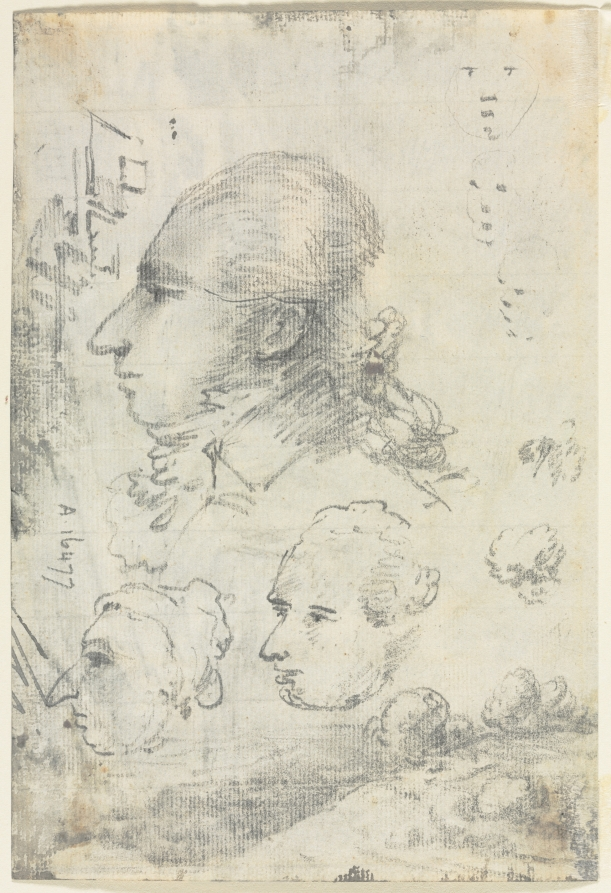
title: Studies of Heads (verso)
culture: England, 18th century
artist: Thomas Monro (British, 1759–1833)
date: c. 1820s(?)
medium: black chalk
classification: Drawing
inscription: verso, in graphite: A 16477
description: Dr. Thomas Monro is best known as a patron who exercised significant influence in the London art world in the late 18th and early 19th centuries, but he was also an amateur artist and competent follower of Thomas Gainsborough. The physician’s drawings were monochromatic, done in wash with additions of charcoal, chalk, or india ink in emulation of Gainsborough’s moody rural views. On the verso of the drawing is a mise-en-page of caricatures and a hillside—perhaps whimsically drawn by multiple artists at one of the doctor’s salons.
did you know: Dr. Thomas Monro established what became known as an "Academy," where artists gathered in the evenings to draw, at his home overlooking the Thames.